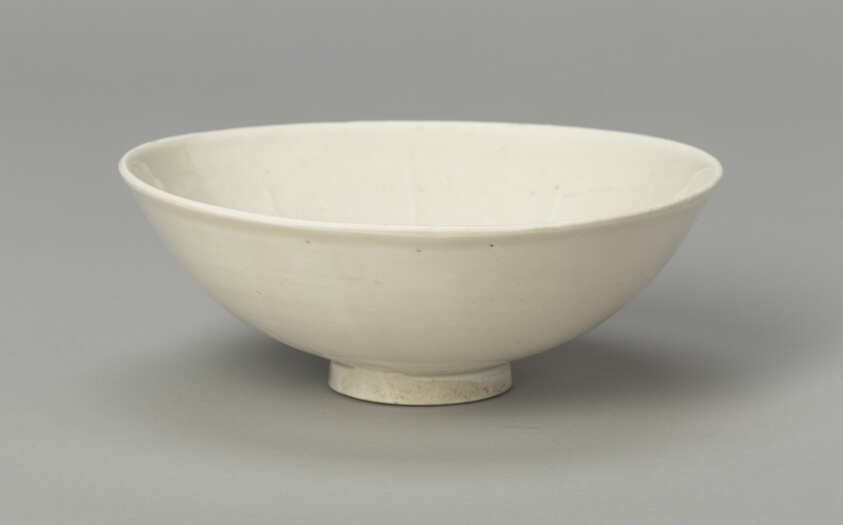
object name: Decorative Arts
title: Bowl with Flowering Branches and Insects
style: Chinese (culture or style)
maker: China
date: Liao (907–1125) or Jin dynasty (1115–1234), c. 10th/12th century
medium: Porcelain with underglaze thread relief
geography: China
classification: bowl; dish (vessel); ceramics; decorative arts